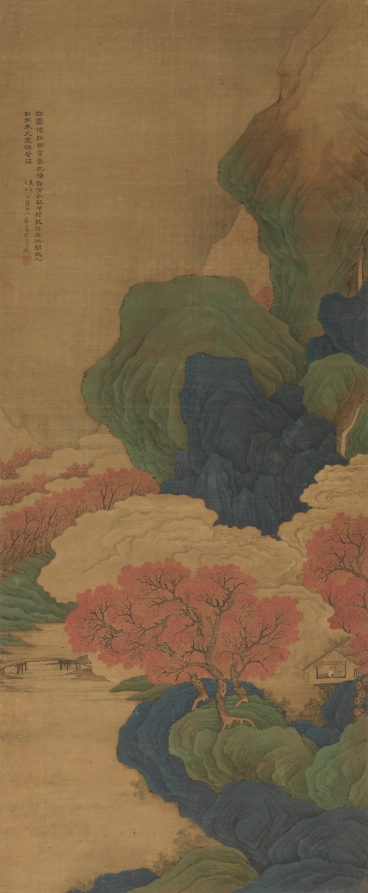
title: White Clouds and Red Trees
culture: China, Qing dynasty (1644-1911)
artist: Li Jian (Chinese, active second half of the 1700s)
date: 1788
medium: hanging scroll, ink and color on silk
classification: Painting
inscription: Artist's inscription, signature, and seal: White clouds surround red trees; Mist has already returned to the valley. Why not rest and let your mind be at peace with the world. With solidarity ch'in [lute] sit in the river pavilion. An old friend is expected but doesn't show up; The day is cold, with maple leaves falling. In the wu-shen year [1788], Erh-ch'iao shan-jen, Li Chien copies and inscribes. [seal] Li Chien Chih yin. trans. HK/LYSL